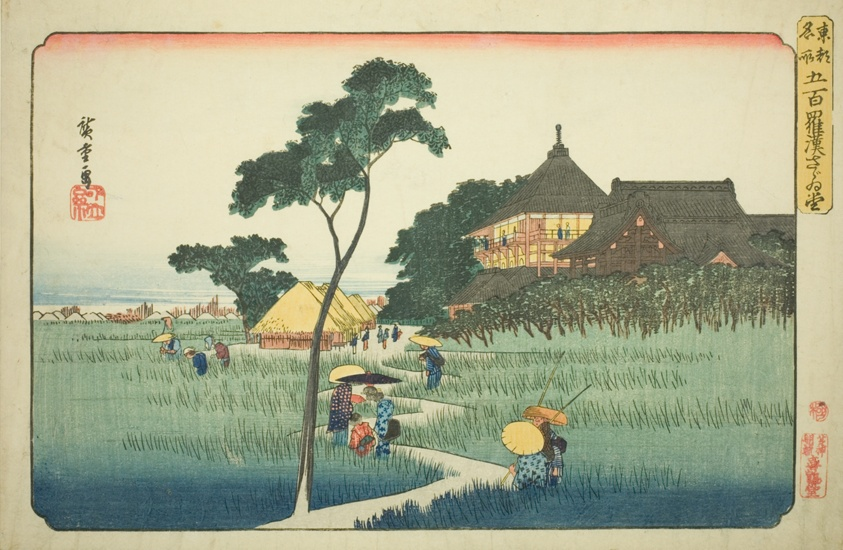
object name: Print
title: Sazai Hall at the Temple of the Five Hundred Arhats (Gohyaku rakan Sazaido), from the series "Famous Places in the Eastern Capital (Toto meisho)"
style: Japanese (culture or style)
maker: Utagawa Hiroshige 歌川 広重; Japanese, 1797-1858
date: c. 1832/38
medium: Color woodblock print; oban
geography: Japan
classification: woodblock print; print; asian art